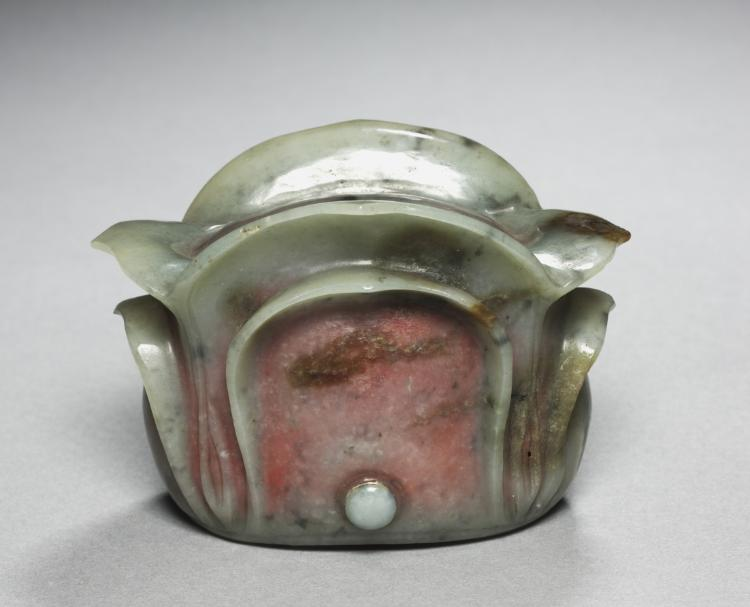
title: Daoist Cap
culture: China, Song dynasty (960-1279) - Yuan dynasty (1271-1368)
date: 960–1279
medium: grayish-green jade with brown and black markings; interior with pink pigment and gold inlays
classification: Jade